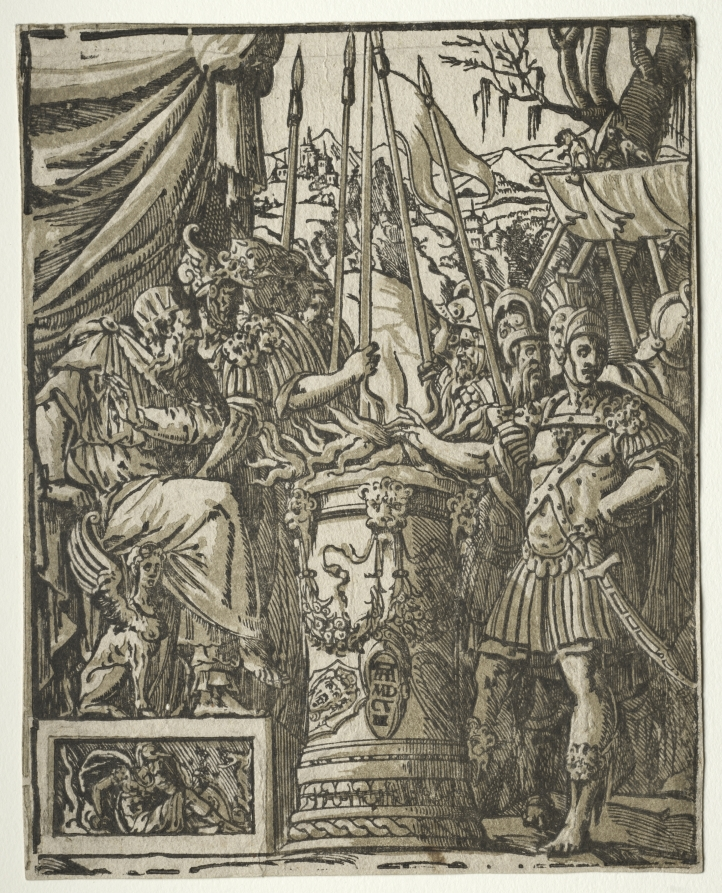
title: Mucius Scaevola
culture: Italy, 17th century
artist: Andrea Andreani (Italian, about 1558–1610)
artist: after Balthasar Peruzzi (Italian, 1481–1536)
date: 1608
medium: chiaroscuro woodcut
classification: Print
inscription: Lettered center on base, monogrammed: "AA / MDCVIII"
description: This chiaroscuro woodcut in two blocks of greenish gray and black was printed after a drawing by Baldassarre Peruzzi. It displays Gaius Mucius Cordus, a youth who saved Rome from the siege ordered by the Etruscan king Lars Porsena in c. 509 BC. The legendary hero was caught while sneaking into the Etruscan camp in an attempt to assassinate Porsena. In this print, Mucius is thrusting his hand into a fire lit for sacrifice to demonstrate his bravery and endurance to torture. Without giving any sign of pain, Mucius earned for himself the nickname "Scaevola" (left-handed), and was freed by his enemy.